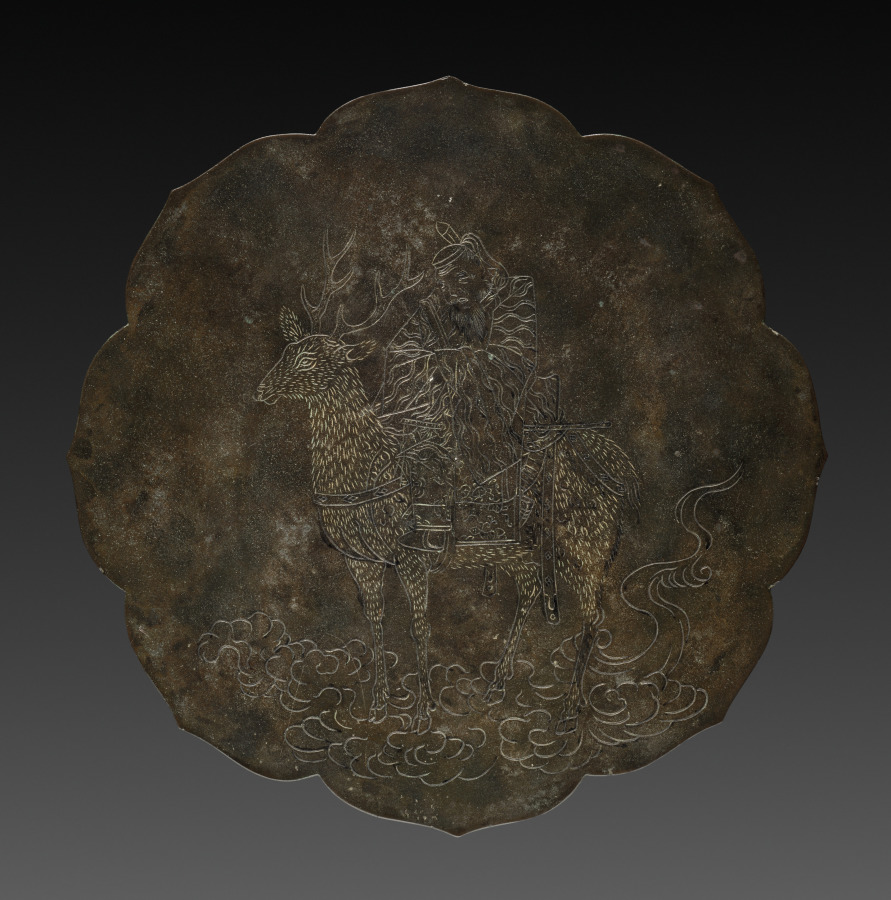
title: Mirror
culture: Japan, Heian period (794–1185)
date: 794–1185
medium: bronze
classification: Metalwork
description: The polished side of this eight-pointed mirror has an incised design of the kami Takemikazuchi riding on a deer from Kashima to Mount Mikasa, where he takes up residence. Although the mirror itself could have been produced as early as the 1300s, the incised line work has a fresh quality more consistent with later works, and the image may have been executed as late as the 1600s–1800s. Unlike most painted images of the episode, this incised one includes neither the sakaki tree branch supporting the Buddhist manifestations of the five Kasuga kami, nor Takemikazuchi’s companions. The back of the mirror has a design of two phoenixes.